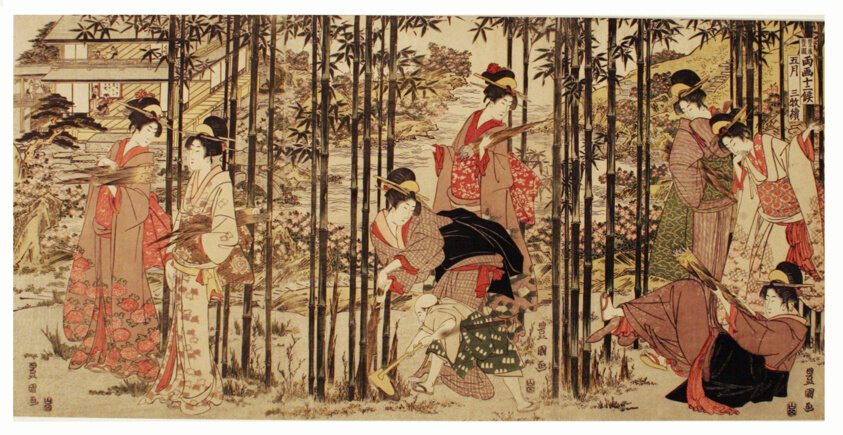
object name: Print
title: The Fifth Month, a Set of Three (Gogatsu sambukutsui), from the series "Twelve Months by the Twin Brushes of Toyohiro and Toyokuni (Toyohiro Toyokuni ryoga juni ko)"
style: Japanese (culture or style)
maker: Utagawa Toyokuni I 初代 歌川 豊国; Japanese, 1769–1825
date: c. 1798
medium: Color woodblock prints; oban triptych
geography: Japan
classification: woodblock print; print; asian art